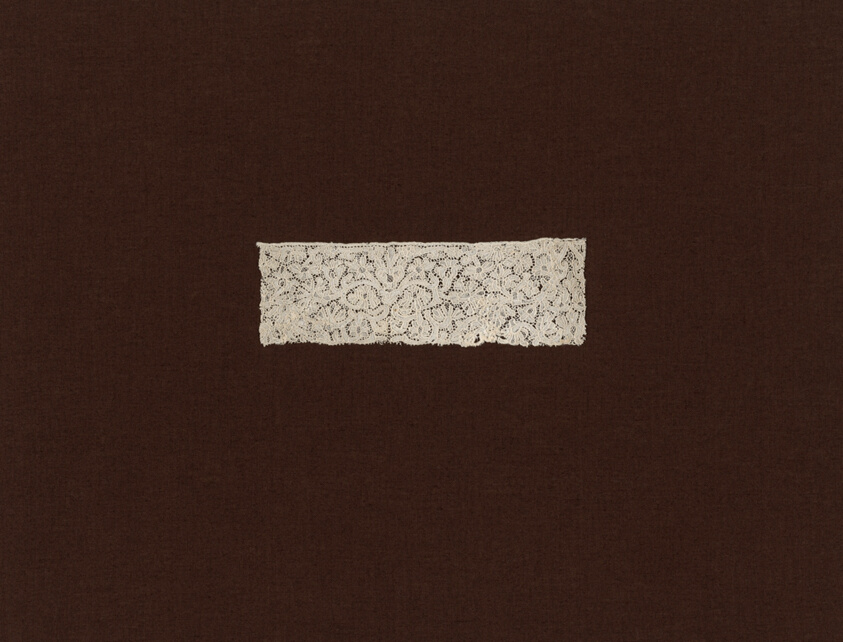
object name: Textile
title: Border (Fragment)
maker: Belgium, Flanders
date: 1625/75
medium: Linen, needle lace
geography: Flanders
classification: textile; lace - needle